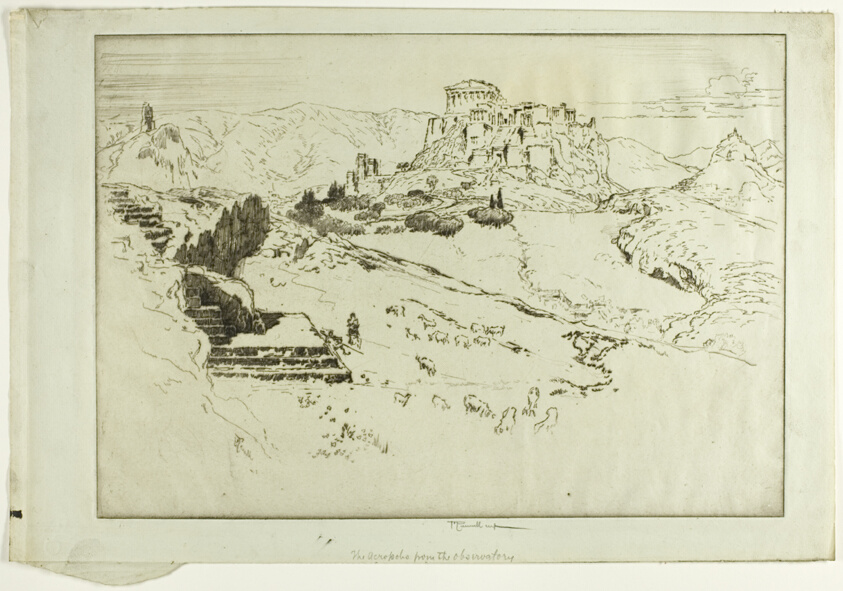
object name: Print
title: The Acropolis from the Observatory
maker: Joseph Pennell (American, 1857-1926)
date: 1913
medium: Etching in brownish ink on cream laid paper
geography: United States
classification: etching; print; prints and drawing